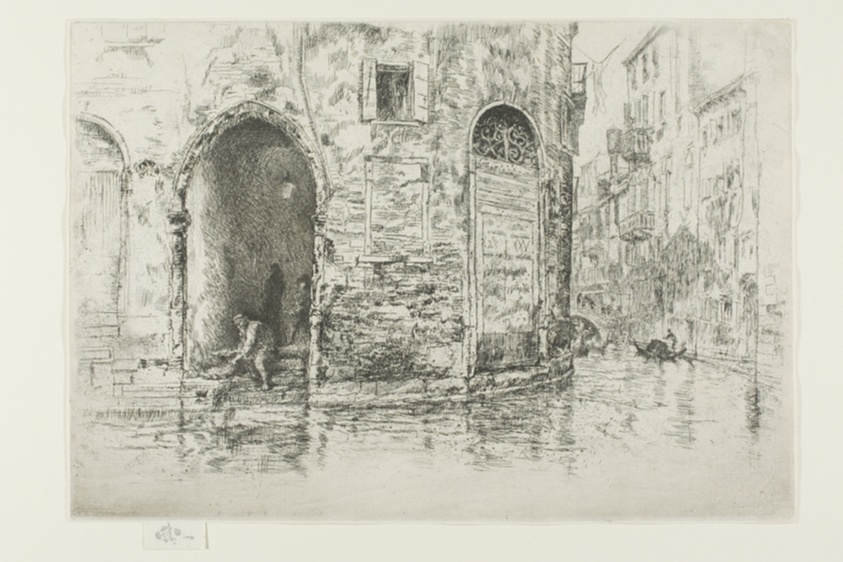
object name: Print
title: The Two Doorways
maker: James McNeill Whistler (American, 1834-1903)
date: 1879/80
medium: Etching with foul biting in black ink on ivory laid paper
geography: United States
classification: etching; print; prints and drawing; foul biting; paper